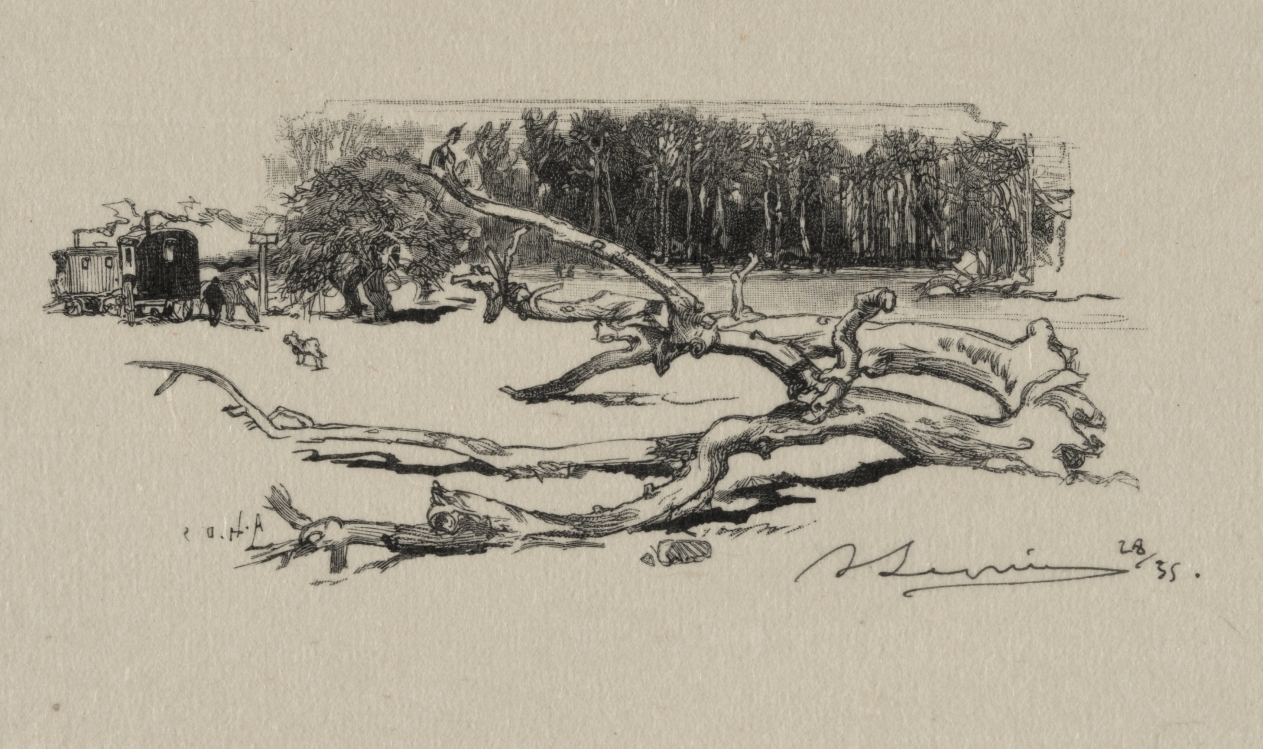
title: Carrefour de l'Epine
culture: France, 19th century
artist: Auguste Louis Lepère (French, 1849–1918)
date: 1887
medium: wood engraving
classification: Print